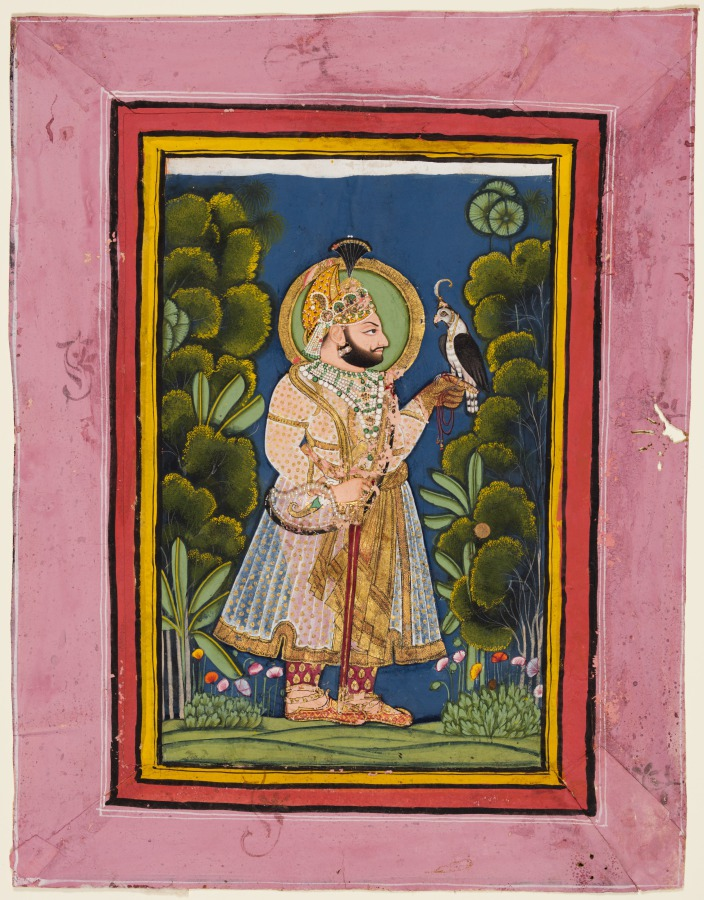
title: Maharana Jawan Singh of Mewar (r. 1828–38) Holding a Falcon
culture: Northwestern India, Rajasthan, Rajput Kingdom of Mewar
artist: possibly by Ghasi (Indian, active c. 1820–36)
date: c. 1835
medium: gum tempera, pearls, silk, and gold on paper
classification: Painting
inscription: mahārāna śrī javāna sīgha jī 36/12 ki[mat] 17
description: A profoundly bejeweled Jawan Singh, ruler of the largest Rajput kingdom, looks his hunting falcon straight in the eye. The bird also appears regal, with a gold plumed cap on the his head and a gold necklace around its neck. The multicolored poppies at his feet and the thick foliage of the trees seem to have parted in deference to his majesty, so his form can be better offset by the flat blue sky.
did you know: Actual pearls have been sewn onto the page at his belt and earrings.